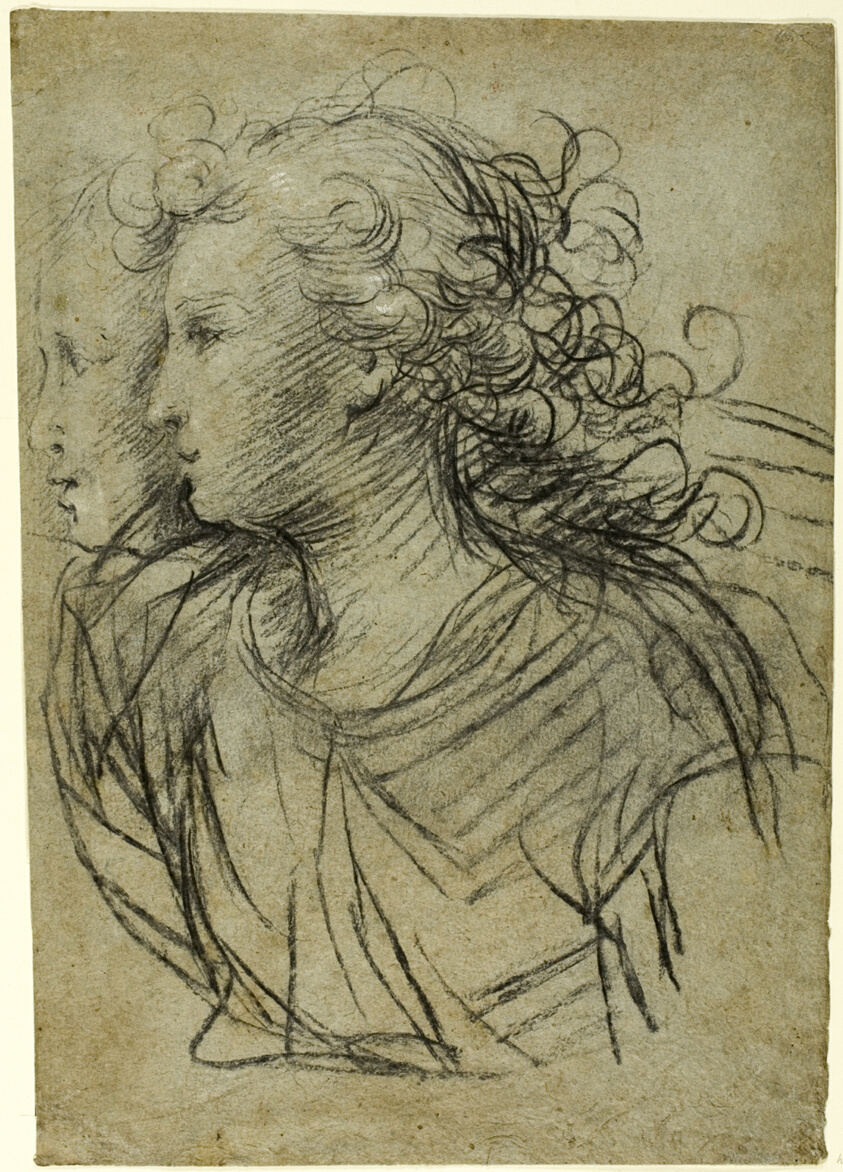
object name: Drawing and Watercolor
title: Half-Length View of Female in Profile to Left (recto); Half-Length view of Figure in Three-Quarter Profile (verso)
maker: Attributed to Jacopo Confortini (Italian, 1602-1672); or an unknown Italian artist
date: 17th century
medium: Charcoal, heightened with touches of white chalk (recto and verso), on blue-brown laid paper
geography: Italy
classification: chalk; drawings (visual works); prints and drawing